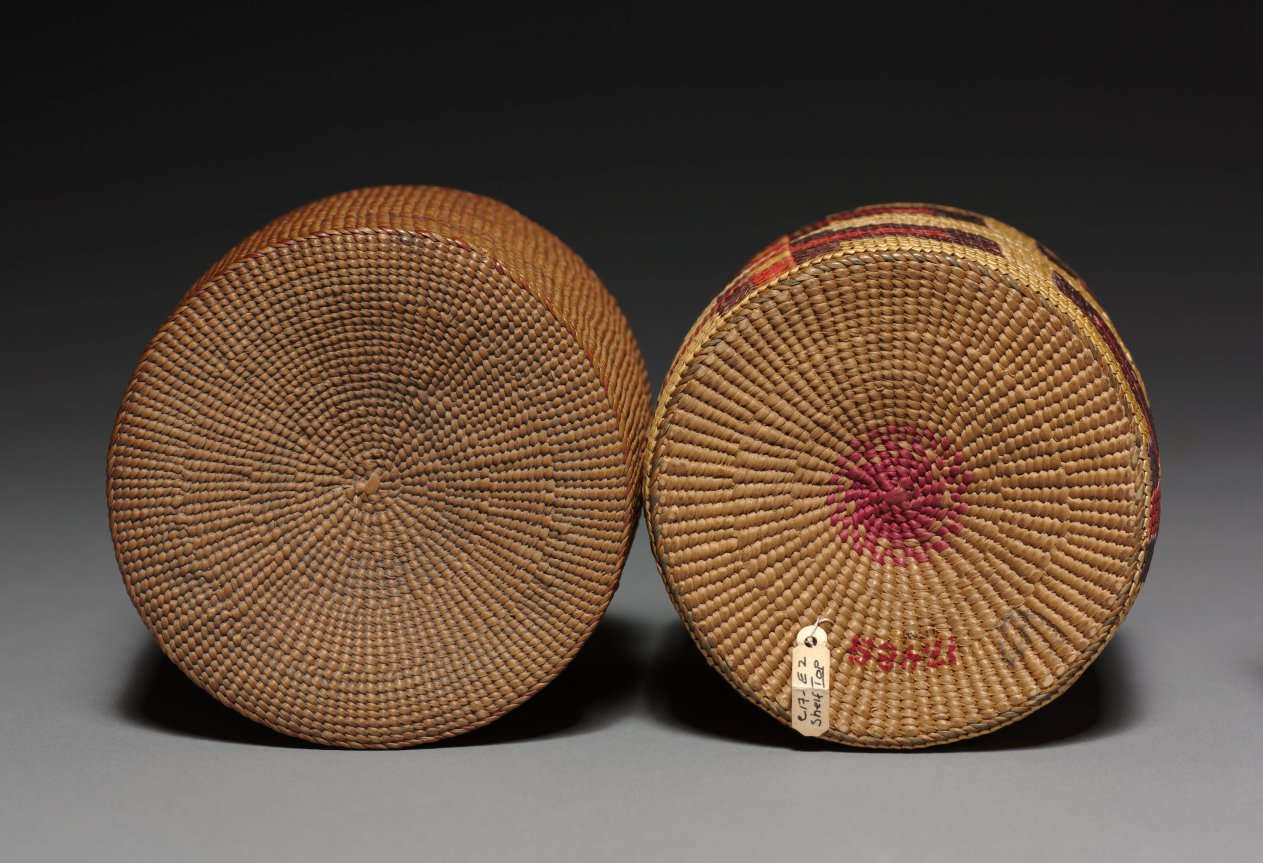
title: Telescoping basket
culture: Northwest Coast, Tlingit, 19th century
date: 1800's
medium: twined spruce root with grass false embroidery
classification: Basketry